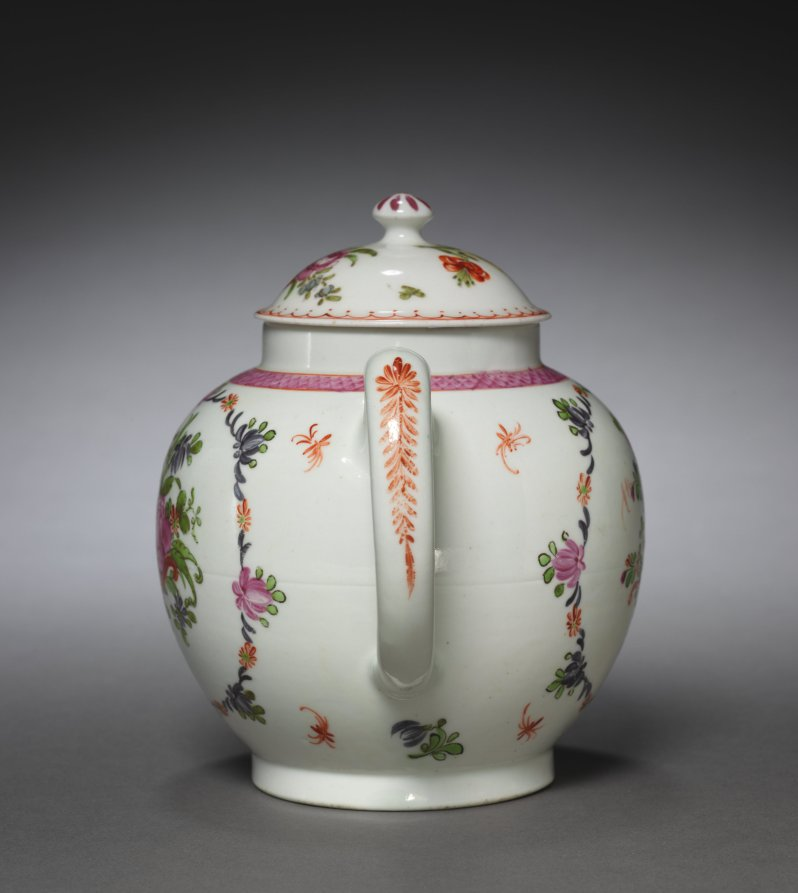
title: Teapot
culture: Staffordshire, England, late 18th century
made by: New Hall Porcelain Factory (British)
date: c. 1782–1790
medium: porcelain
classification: Ceramic